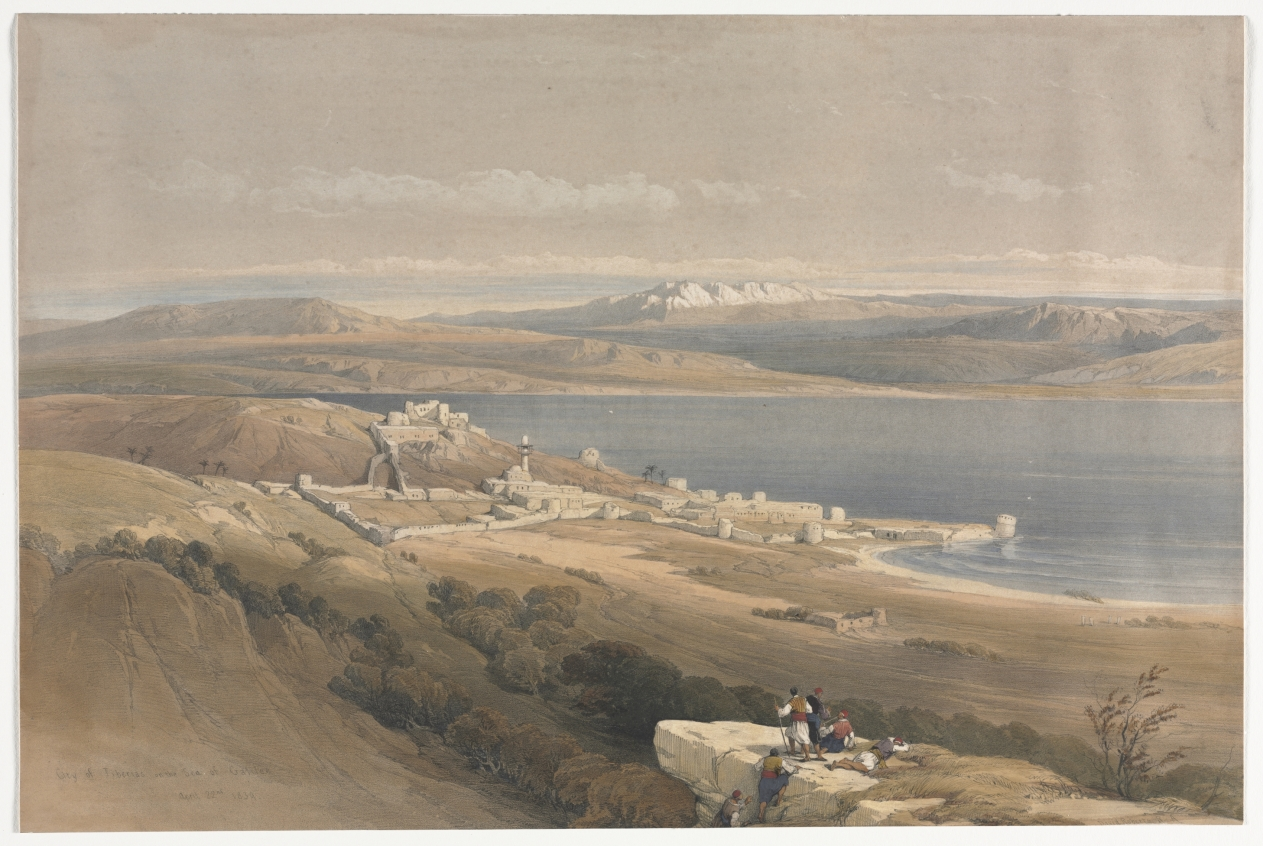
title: City of Tiberias on the Sea of Galilee, looking towards Hebron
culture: England, 19th century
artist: David Roberts (Scottish, 1796–1864)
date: 1839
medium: color lithograph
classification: Print